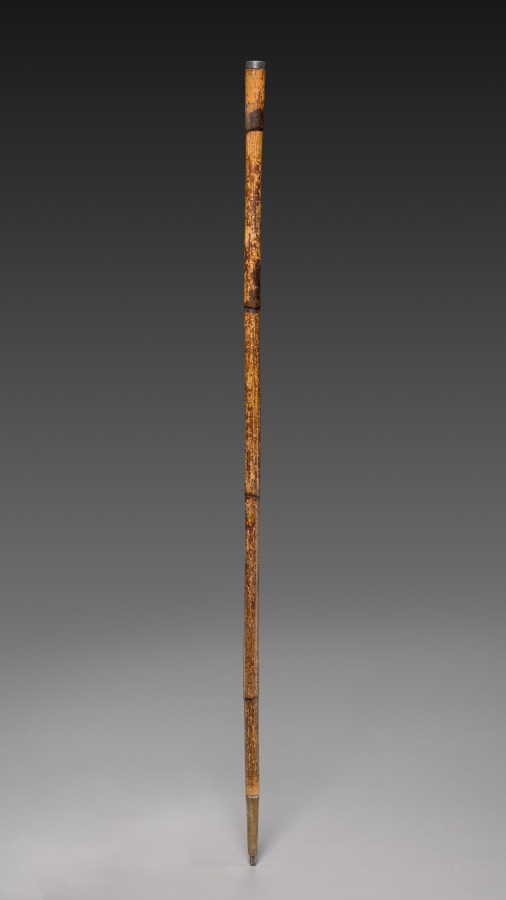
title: Walking Stick of Moses Seymour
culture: America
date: 1774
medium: wood and metal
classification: Miscellaneous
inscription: Entwined initials on top of handle; inscribed on edge: "Moses Seymour 1774"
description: At the age of fifteen, Moses Seymour Jr., sat for a portrait that honors both its sitter and implicitly, his father, the former Revolutionary War major from Litchfield, Connecticut, who commissioned this work. Like so many American painters of his generation, Earl studied with Benjamin West in London. Upon his return, he practiced his profession in his native Connecticut River Valley. Seymour's book and cane suggest that the young man reads and walks in harmony among nature's beauties, an activity that recalls the ideals of the ancient Roman poet Horace. In a pose that presses him close to the foreground, however, this cultured figure also conveys a message about man's domination over nature. The painting remained in the sitter's family until it was given to the museum.